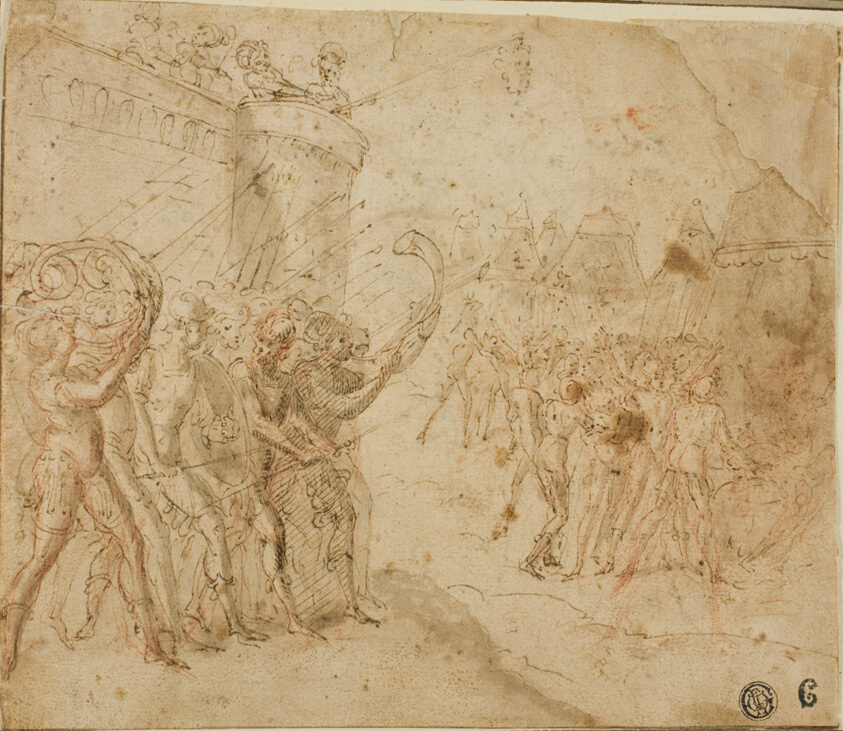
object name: Drawing and Watercolor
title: Joshua Commanding the Israelites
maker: Circle of Jacopo Zanguidi, called Bertoia (Italian, 1544-c.1573); or Circle of Federico Zuccaro (Italian, 1540/41-1609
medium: Pen and brown ink with red chalk and brush and brown wash, on tan laid paper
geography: Italy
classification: pen and ink drawings; drawings (visual works); prints and drawing